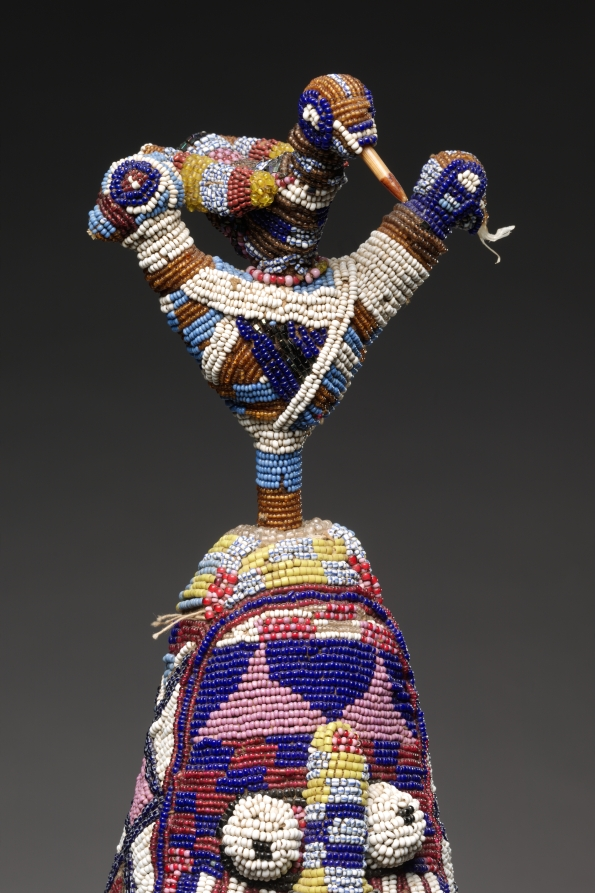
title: Crown (adéńlá)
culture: Africa, West Africa, Nigeria, Yorùbá-style maker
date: 1900s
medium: Cloth (probably cotton and wool), glass beads, reeds, cardboard, wood, plant fiber, cotton, and quills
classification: Garment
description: The most important of all regalia, topped with the "royal bird" Okin, this headdress connects the king to Oduduwa, the mythical founder of the Yoruba. The veil of beaded strings masks the identity of the wearer and protects his subjects from the supernatural powers that radiate from his face. The crown also signifies the "inner head" of the king, the locus of an awesome life force called ase.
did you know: No one––not even the king who wears it––is allowed to look inside this crown, as that's where it is most powerful.